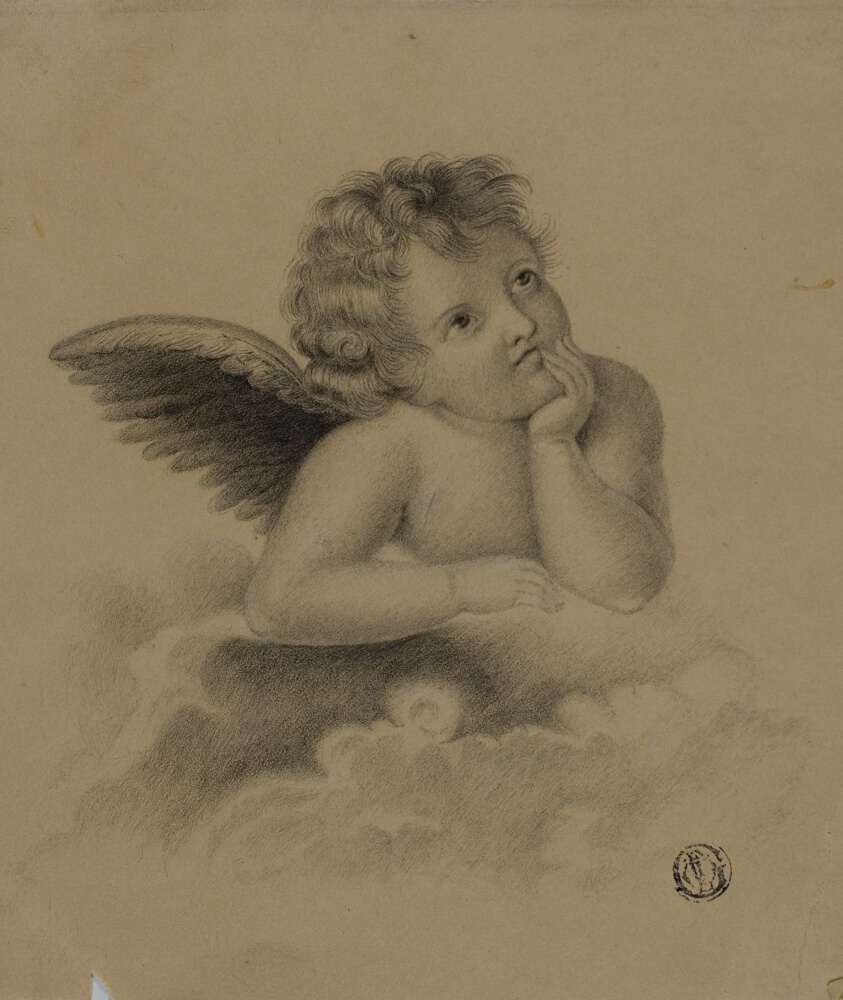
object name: Drawing and Watercolor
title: Putto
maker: After Raffaello Sanzio, called Raphael; Italian, 1483-1520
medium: Black crayon, heightened with traces of white chalk, on tan wove paper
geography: Italy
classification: crayon; drawings (visual works); prints and drawing